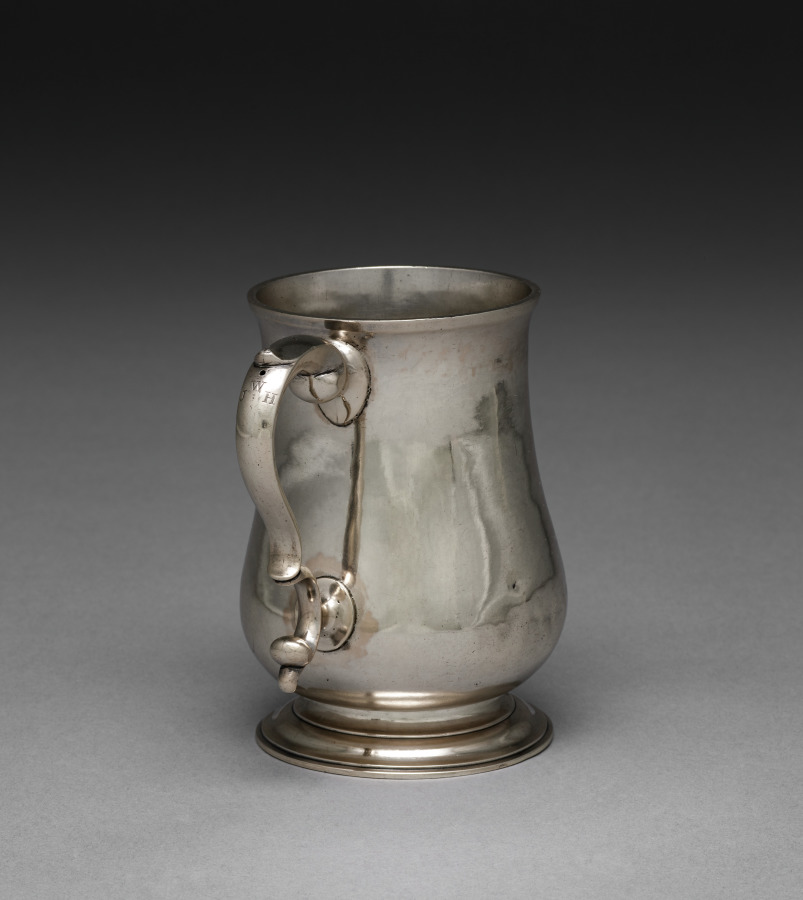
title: Cann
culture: America, Massachusetts, 18th century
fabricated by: Samuel Bartlett (American, 1752–1821)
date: c. 1775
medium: silver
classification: Silver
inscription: engraved "W" over "JH" in block letters on handle beneath thumbpiece.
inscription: Stamped underside: "S.B".